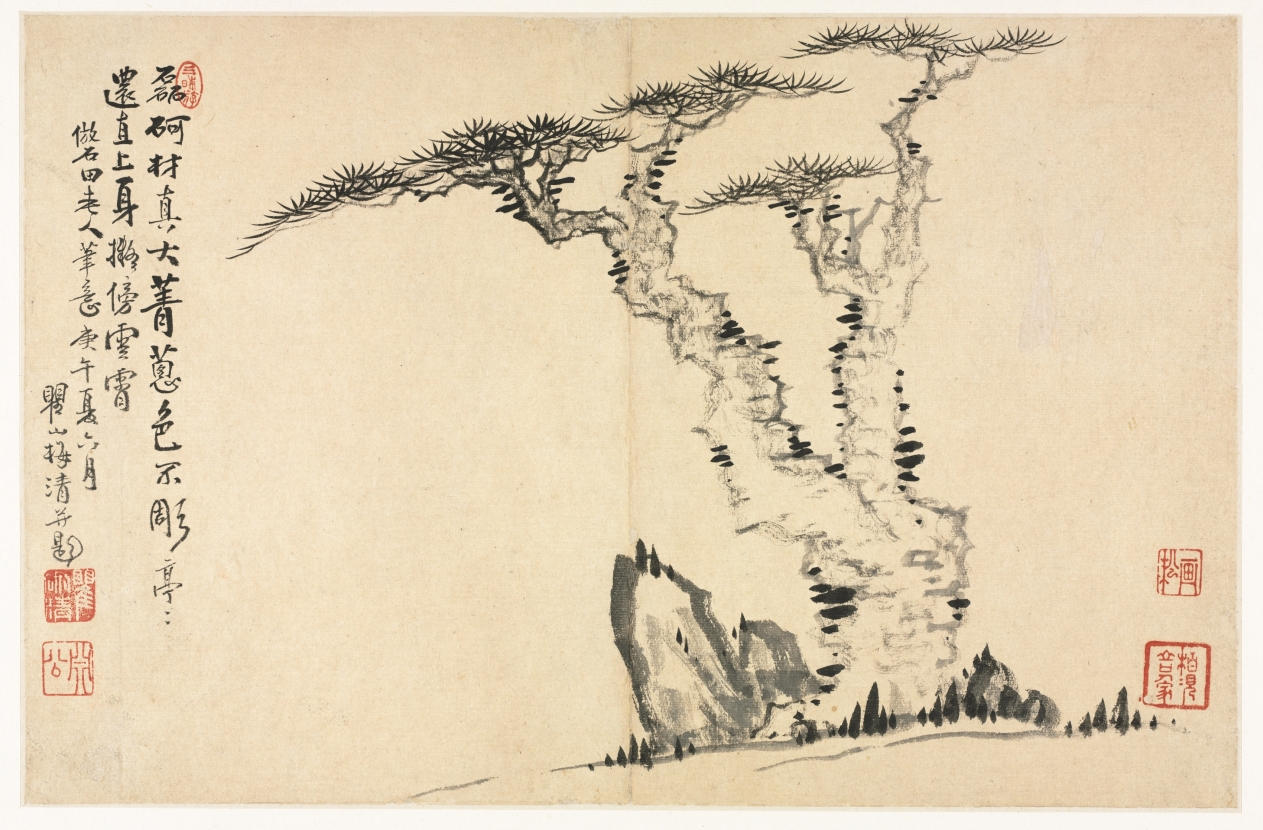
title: Landscapes in Various Styles after Old Masters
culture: China, Qing dynasty (1644-1911)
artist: Mei Qing (Chinese, 1623–1697)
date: 1690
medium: album leaf: ink and color on paper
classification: Painting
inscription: Summer Leaf III (formerly Leaf D). Artist's inscription, signature, and seals: [seal] Sanmei you. Massive in size, its trunk is truly grand,/ Luxuriant in foliage, its color never fades./ Standing along and still growing upwards,/ The trunk intends to be beside the clouds. Mei Qing of Qushan [painted] and inscribed in imitation of old Shih-t'ien's [Shen Zhou] brush idea in the gengwu year [1690], summer, the sixth month. [2 seals] Quxing, Qing; Yuangong. [2 seals, lower right corner] Huasong; Bo jian shan kou ren jia.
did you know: The inscription dates this album to summer 1690, shortly after Mei Qing's second trip to Huangshan 黃山 (Mt. Huang or Yellow Mountain).